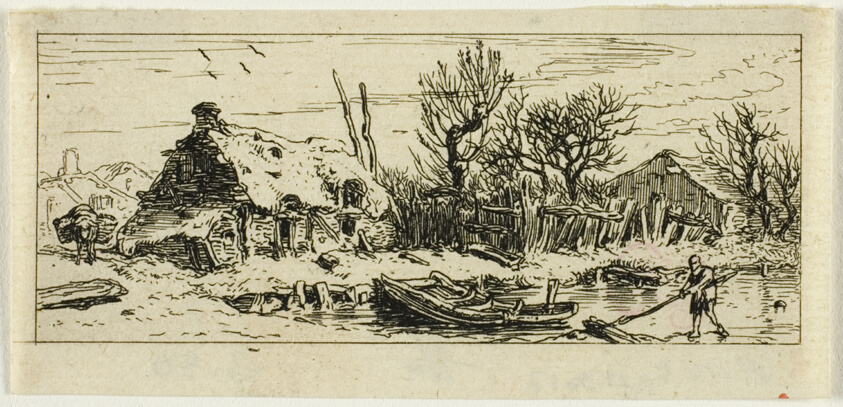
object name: Print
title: The Frozen Pond, small plate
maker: Charles Émile Jacque (French, 1813-1894)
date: 1845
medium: Etching on ivory laid paper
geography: France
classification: etching; print; prints and drawing